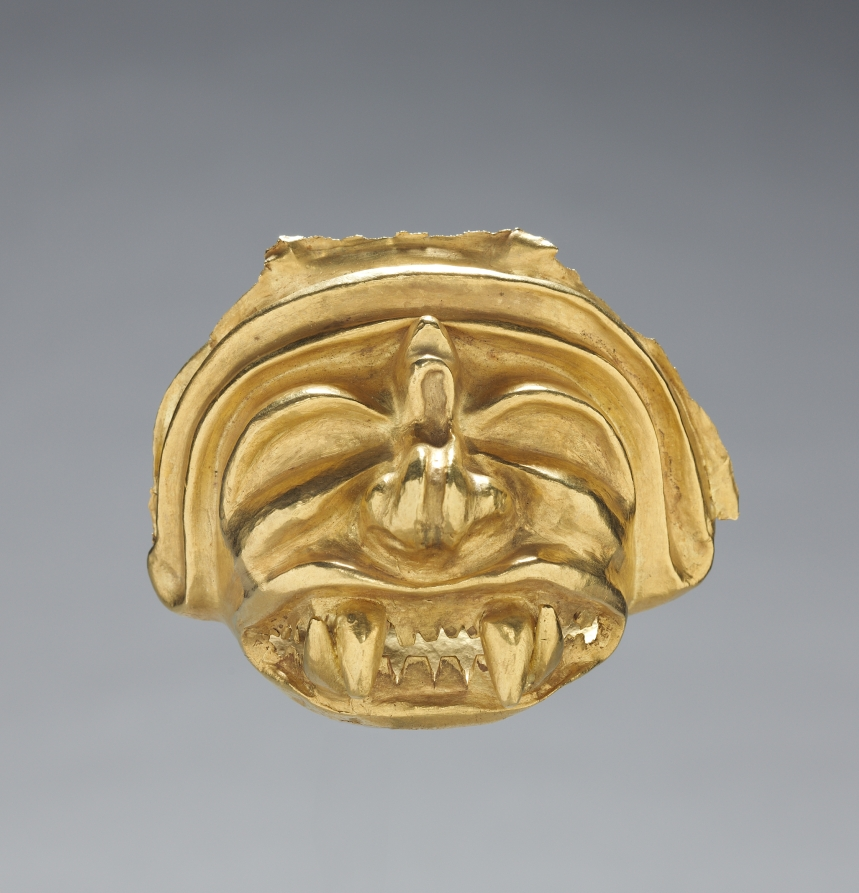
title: Mask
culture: Peru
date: 200–1000 CE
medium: gold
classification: Metalwork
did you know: Fangs were a marker of supernatural power for many ancient Andean societies.